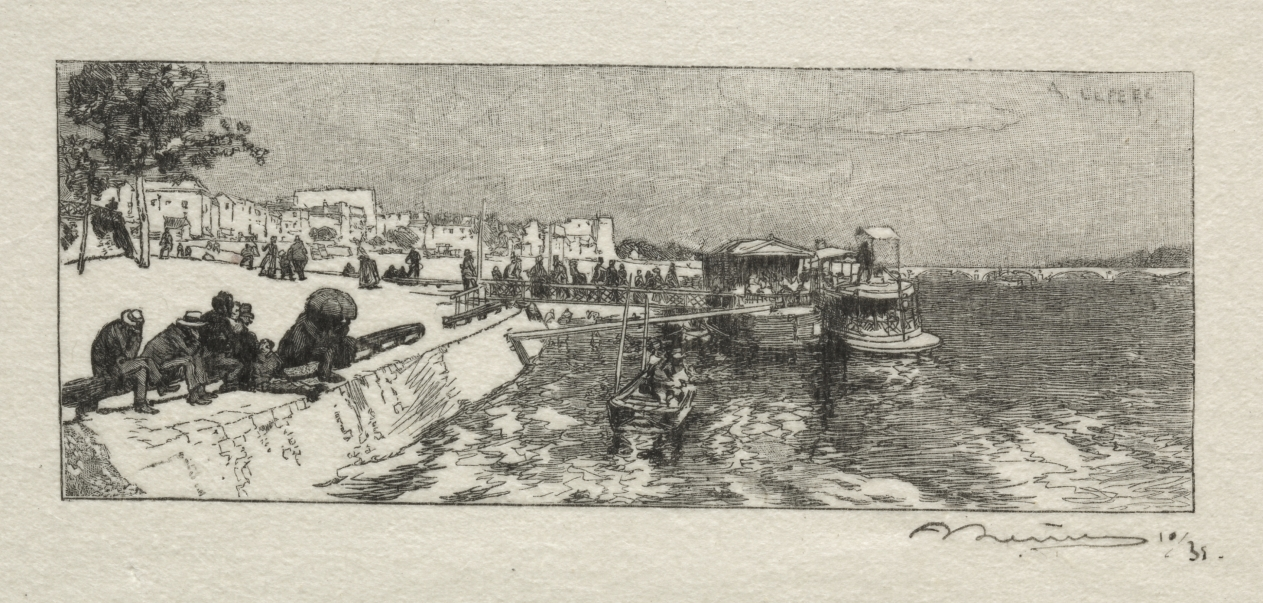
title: Embarcadére a Bercy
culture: France, 19th-20th century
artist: Auguste Louis Lepère (French, 1849–1918)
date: 1890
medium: wood engraving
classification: Print